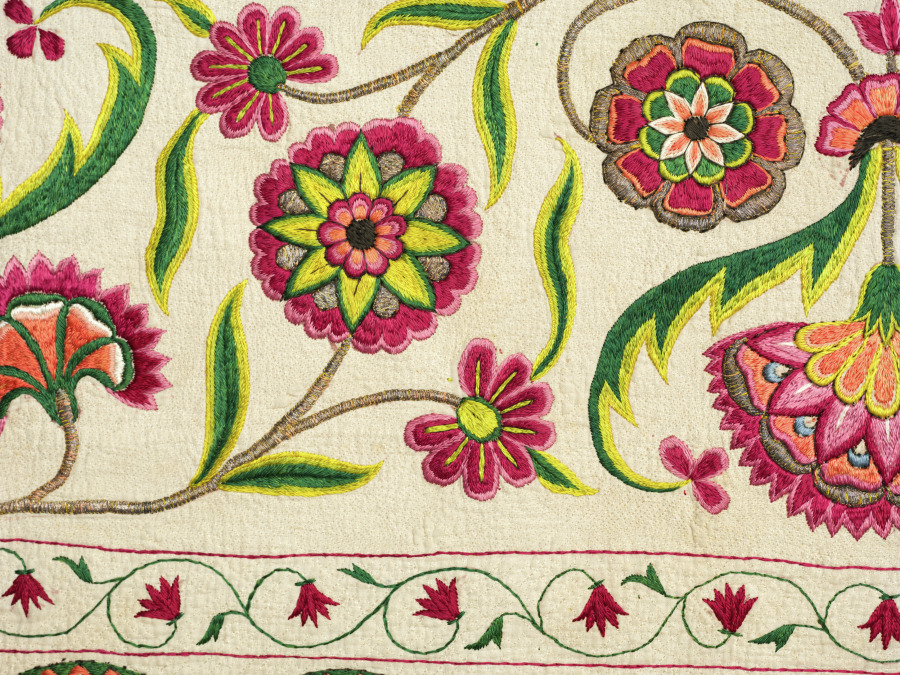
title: Spread with floral medallion pattern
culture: Mughal India, Deccan, probably Goa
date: 1700s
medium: Cotton: plain weave, quilted; silk and gilt-metal thread: embroidery, couched laid work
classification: Embroidery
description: This textile could have been used as a covering for seating on the floor or as a bedspread in either an Indian or European setting. In any case, it was not meant to be walked on. Its material and imagery testify to flourishing international relationships. The arabesque designs, consisting of swirling vines with large and small flowers, recall a radiant paradise and have roots in Persian, Chinese, and Mediterranean sources. The use of gold-wrapped thread had been widespread in Spain and Portugal before it was adopted in India, probably first in Goa, a Portuguese colony on the southwestern coast of India from 1510 to 1961. The vibrant colors are distinctive to this region of India.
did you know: A small blue and yellow bird perches at the center of the otherwise solely floral design.